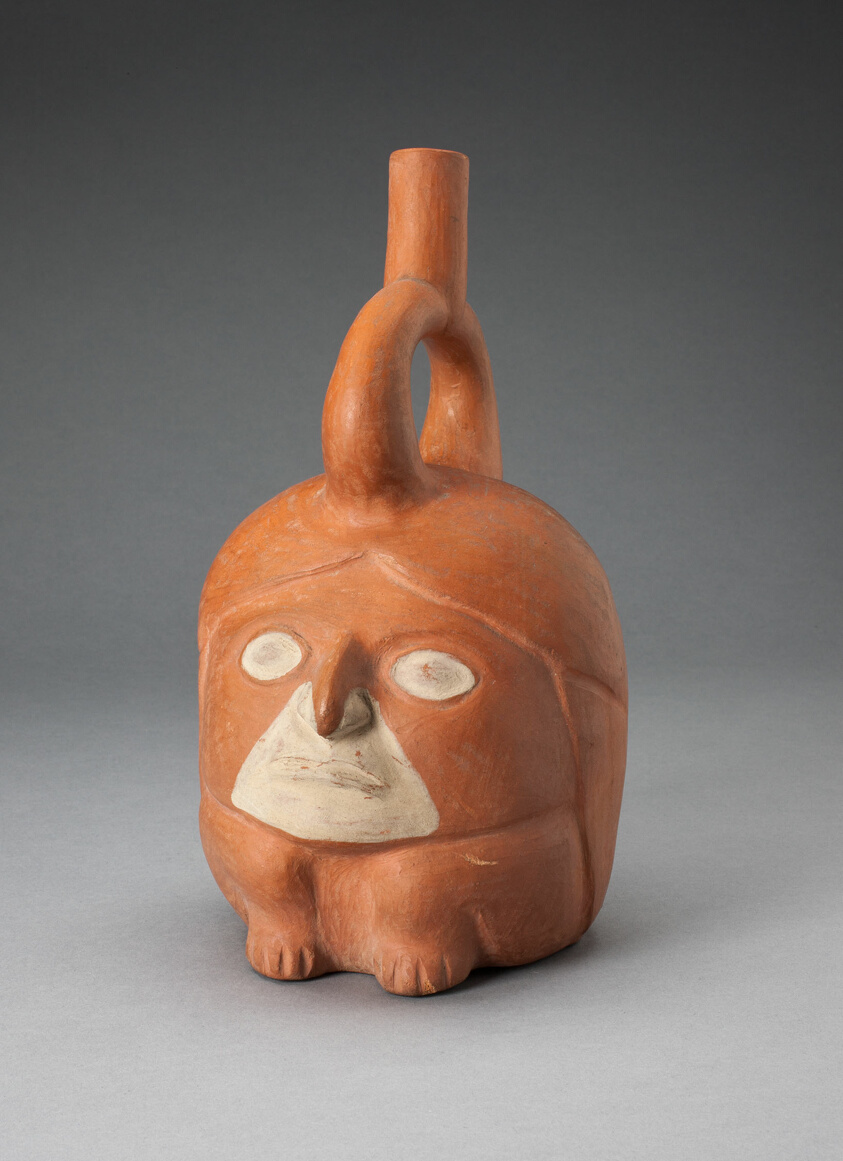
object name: Vessel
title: Abstract Portrait Vessel of a Ruler with Head reasing on Legs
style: moche, mochica, early intermediate period, Pre-Columbian, americas, Arts of the Americas, andean, andes, south american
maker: Moche (North coast, Peru)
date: 100 BCE–500 CE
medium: Ceramic and pigment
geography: Peruvian North Coast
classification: earthenware; ceramics; vessel; art of the americas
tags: people, portraits